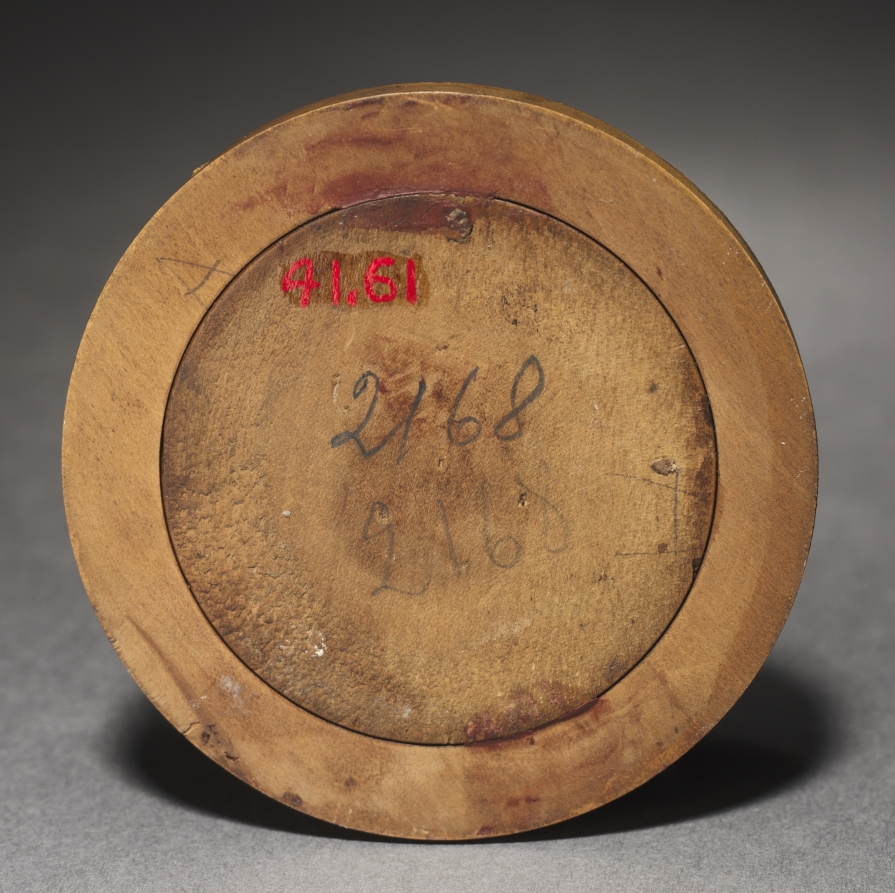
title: Portrait of a Man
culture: Germany, early 16th century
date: early 1500s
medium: boxwood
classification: Sculpture